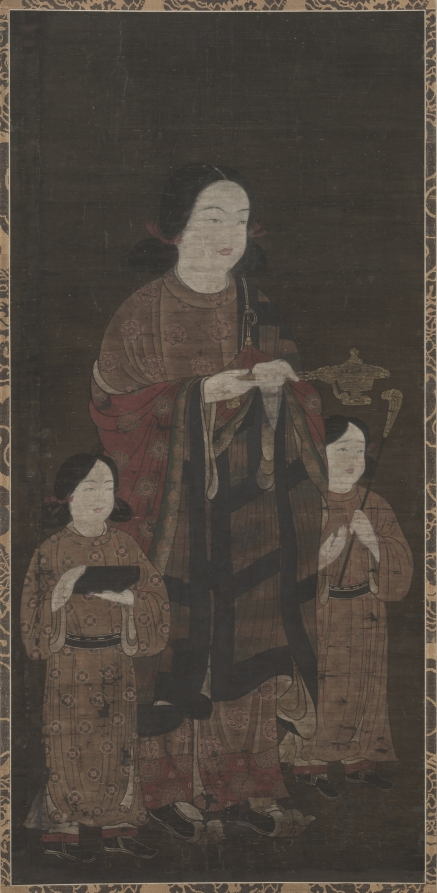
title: Shōtoku Taishi at Sixteen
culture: Japan, Muromachi period (1392–1573)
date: 1400s-1500s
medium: hanging scroll; ink and color on silk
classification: Painting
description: The 16-year-old prince regent Shōtoku Taishi, garbed in Buddhist vestments, bears an incense burner. He is flanked by two attendants; one carries religious texts in a box and the other holds a nyoi ceremonial Buddhist scepter. The two are sometimes identified as Shōtoku’s younger brother, Prince Eguri, and eldest son, Prince Yamashiro. Shōtoku has come to pray for his father, Emperor Yōmei (reigned 585–87), who is ill and on the point of death. Upon a miraculous recovery, the emperor accepted Buddhism.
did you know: One name for Shōtoku is "Prince Stable Door."